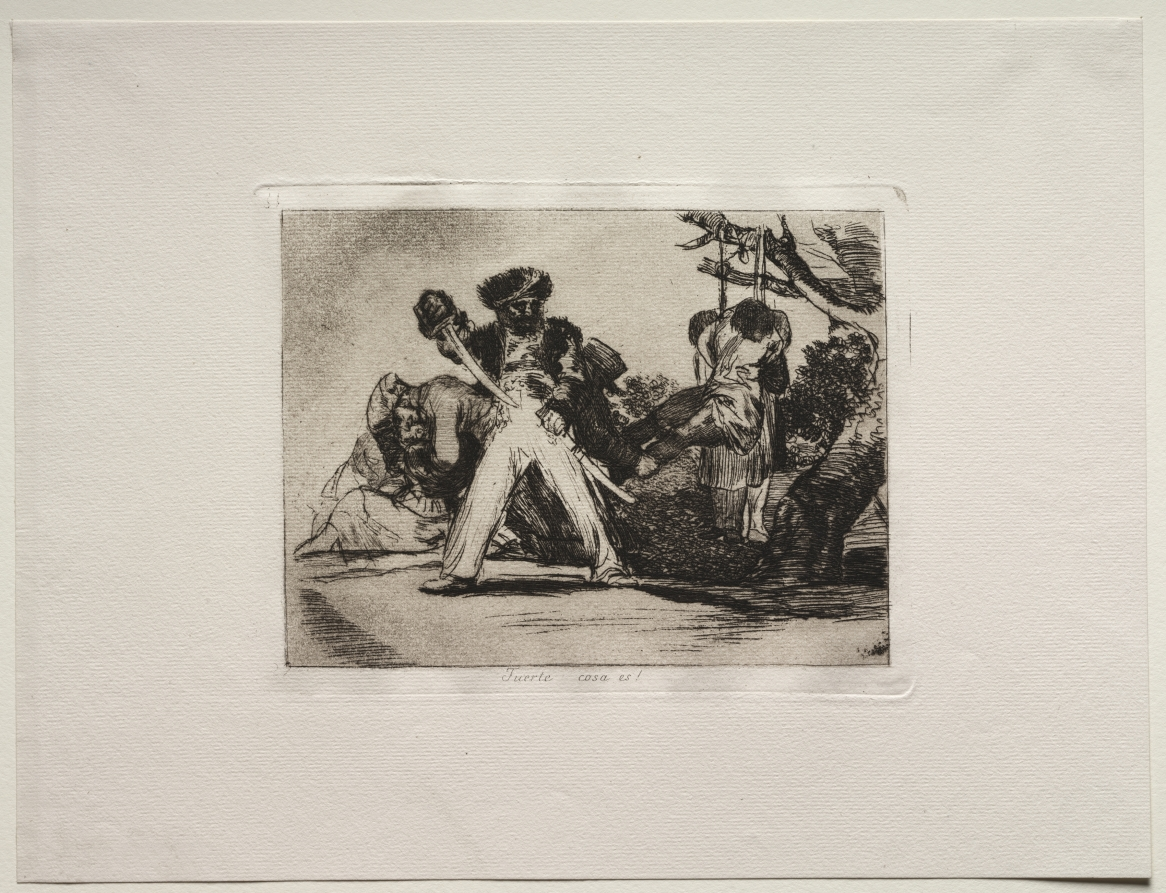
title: The Horrors of War: That's Tough!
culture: Spain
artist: Francisco de Goya (Spanish, 1746–1828)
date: c. 1810–20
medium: etching and aquatint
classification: Print